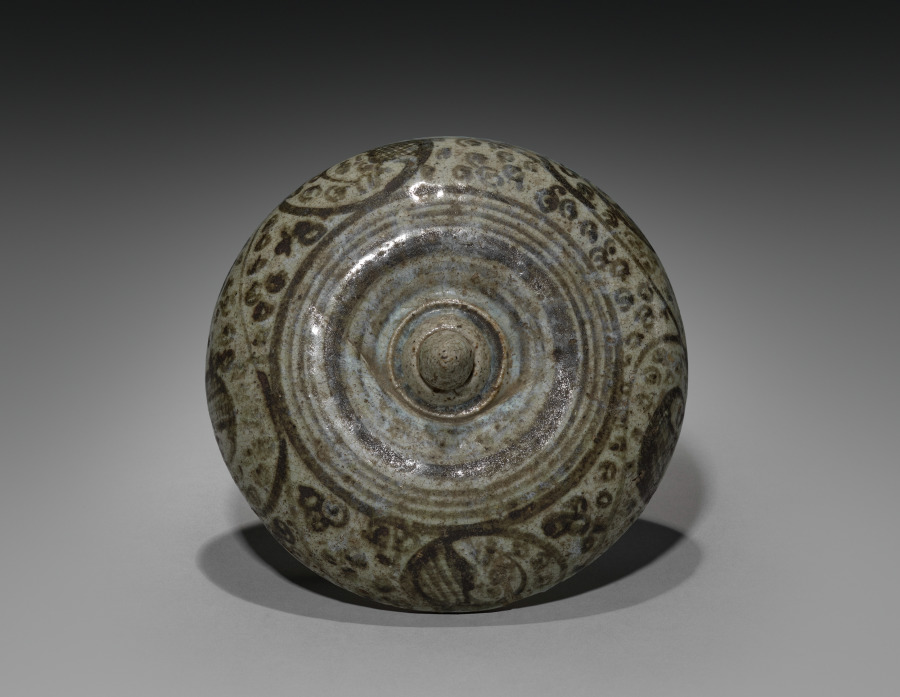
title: Covered Bowl with Painted Decoration (lid)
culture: Siam, Sawankhalok ware, 15th century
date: 1400s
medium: stoneware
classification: Ceramic